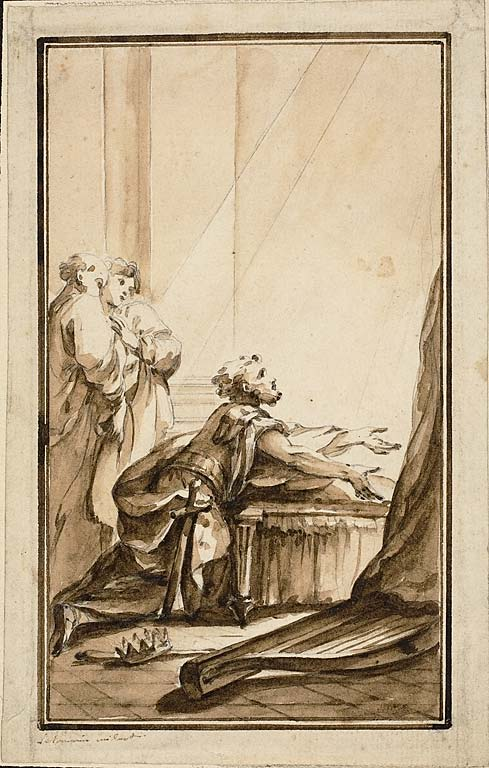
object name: Drawing and Watercolor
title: King David Kneeling in Penitence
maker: Louis Joseph le Lorrain (French, 1715-1759)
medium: Pen and brown ink and brush and brown wash, with graphite, on ivory laid paper, edge-mounted on buff laid paper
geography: France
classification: ink or chalk wash; drawings (visual works); prints and drawing